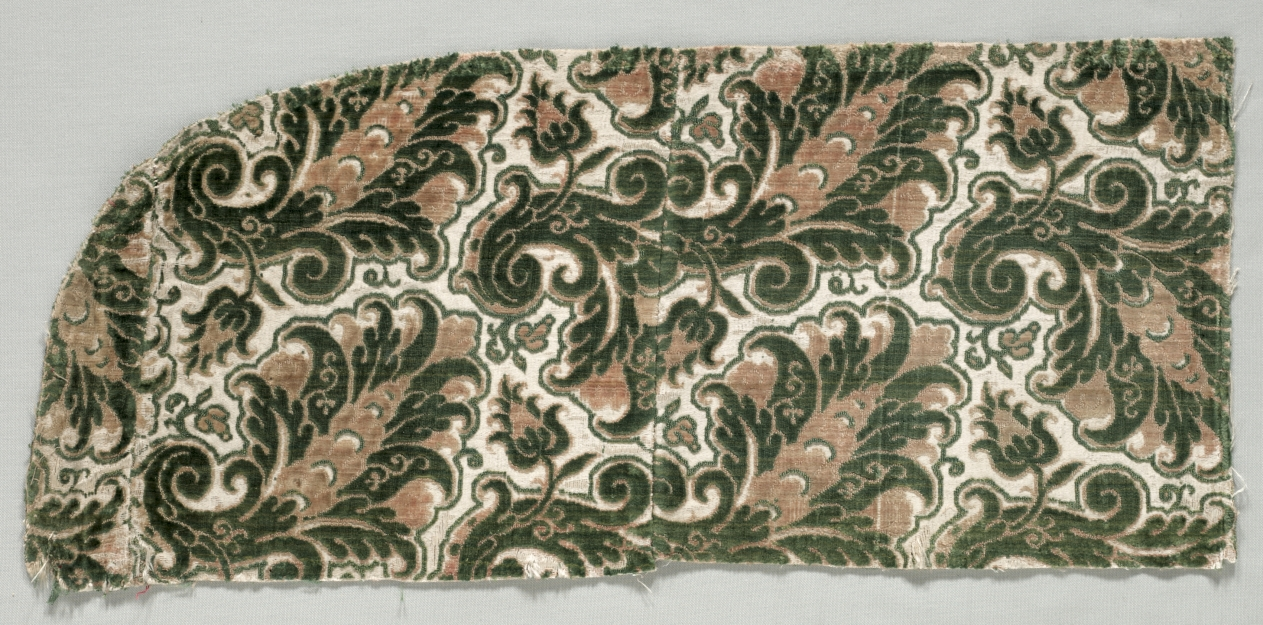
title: Velvet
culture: Italy, 17th century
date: c. 1650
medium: velvet (cut, uncut, and voided)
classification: Velvet